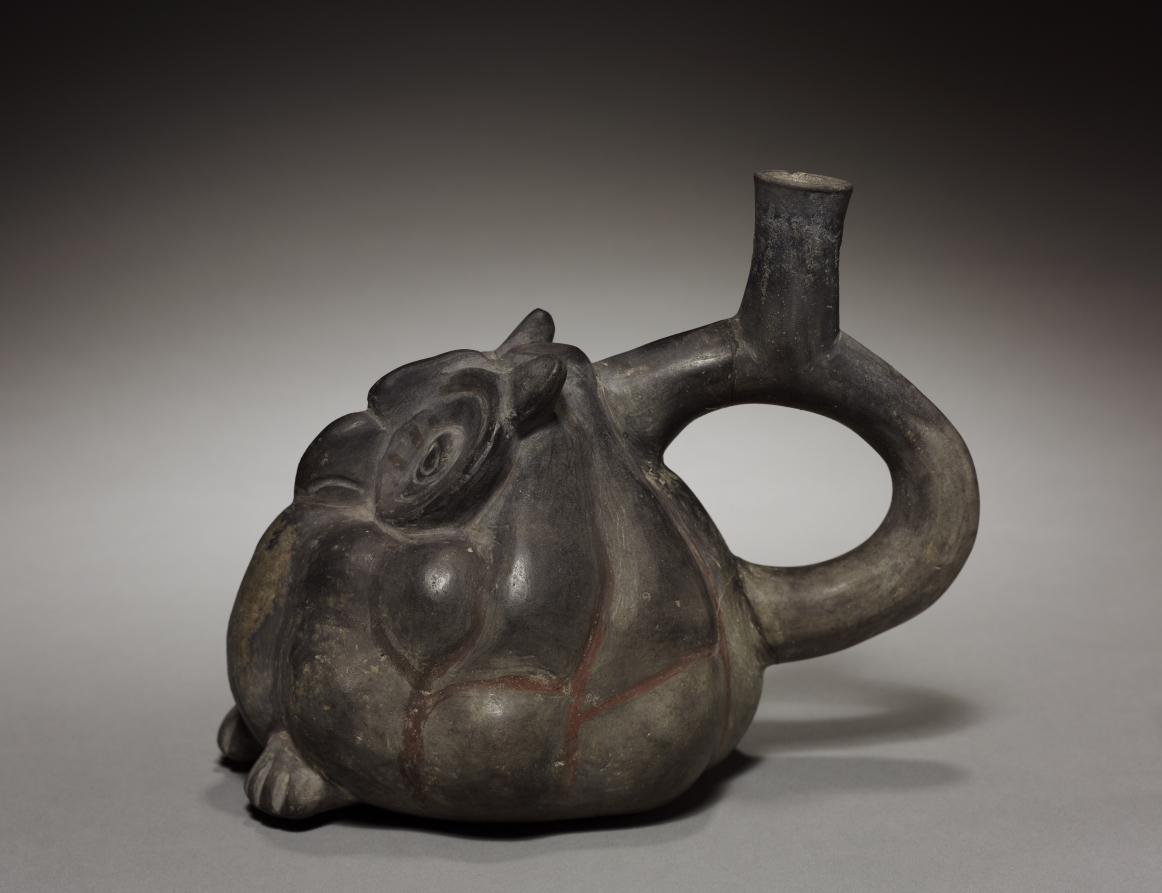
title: Bottle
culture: Peru, Chimú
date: 900–1470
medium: black ware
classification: Ceramic